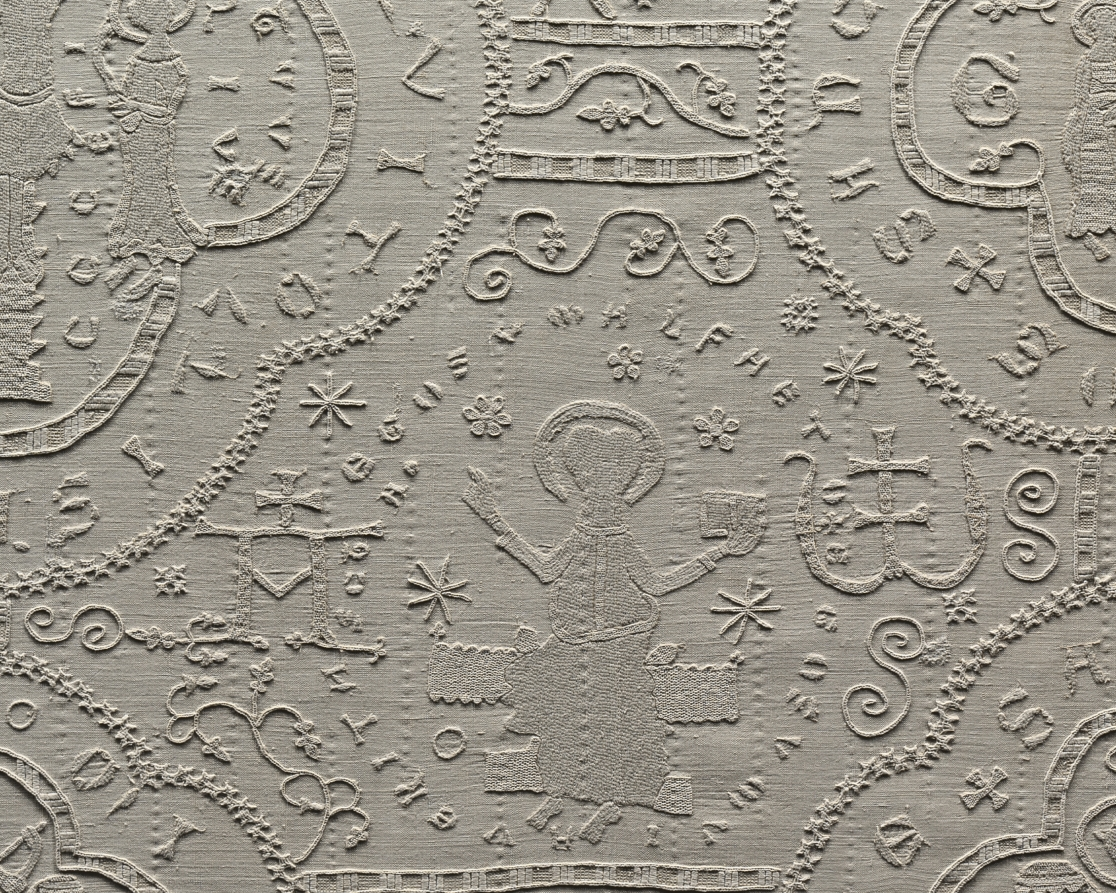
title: Altar Cloth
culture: Germany, Altenberg on the Lahn, Premonstratensian Convent, 14th century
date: c. 1350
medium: embroidery: linen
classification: Embroidery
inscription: various motifs enclosed in quatrefoils with identifying inscriptions in Gothic letters.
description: This large, embroidered altar cloth is one of the rarest, most important medieval church furnishings in existence. It was stitched by nuns in the Premonstratensian Convent in Altenberg on the Lahn River, north of Frankfurt, Germany, and was used to cover the church’s high altar in the weeks leading up to Easter. The cloth is an example of linen embroidery, a specialty of German nuns in the later Middle Ages. The Altenberg monastery church once had valuable furnishings; the high altar retable (a decorated frame with sculptures and paintings on the top of an altar) has survived, the main parts of which are now in the Städel Museum in Frankfurt, Germany.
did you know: When lit from behind, the previously hidden details emerge and the complex design becomes evident.